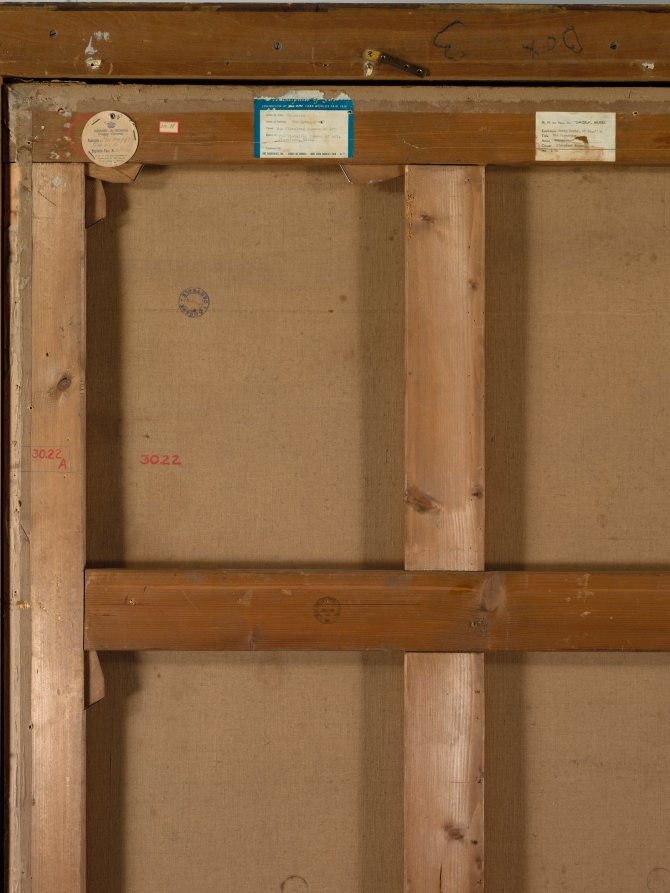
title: Interior of a Synagogue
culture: Italy, 18th century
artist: Alessandro Magnasco (Italian, 1667–1749)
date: c. 1725–35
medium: oil on canvas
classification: Painting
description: The Jewish synagogue was among Magnasco's most frequently painted subjects, here presented in a mystical and imaginative way. Expansive architectural space creates room for a multitude of tiny, fantastical figures with elongated limbs. These characters respond to the service with emotion and expressive gestures. Flashes of light dash across the surface against a dark, muted palette of earthy tones suggesting an otherworldly presence. The composition invites the viewer to enter the space and experience the service. Though he used characteristic elements of Baroque composition and was strongly influenced by Venetian painting, Magnasco's loose brushwork, elongated figures, and mysterious subject matter set him apart. Magnasco peers into a world of which he was not part: he was not Jewish and probably perceived Jews as outsiders. At the dawn of the Enlightenment in Europe progressive aristocratic families commissioned paintings by Magnasco, suggesting the painter's support for Enlightenment ideals which included religious tolerance, but Magnasco's personal views on Judaism in Italy remain unknown.